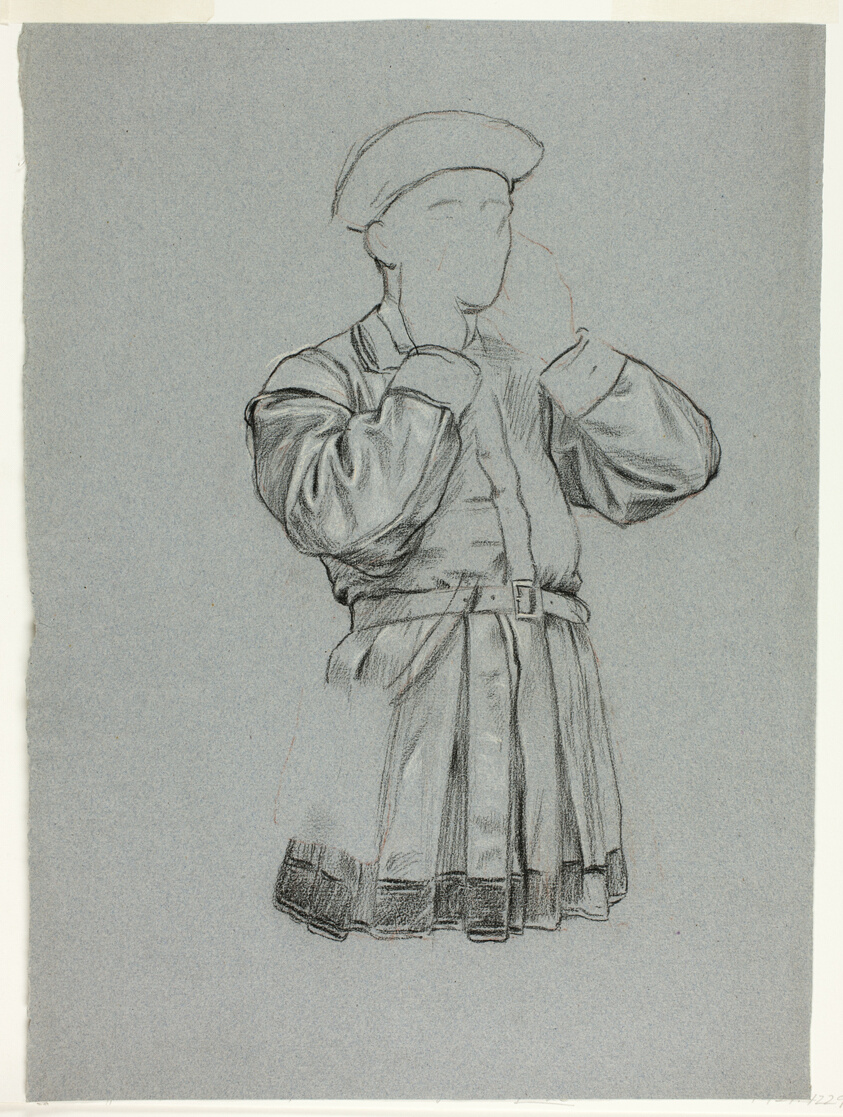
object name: Drawing and Watercolor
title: Unfinished Sketch of Man in Tunic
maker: Henry Stacy Marks (English, 1829-1898)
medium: Black pastel, heightened with red and white pastel, on blue laid paper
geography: England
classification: pastel; drawings (visual works); prints and drawing